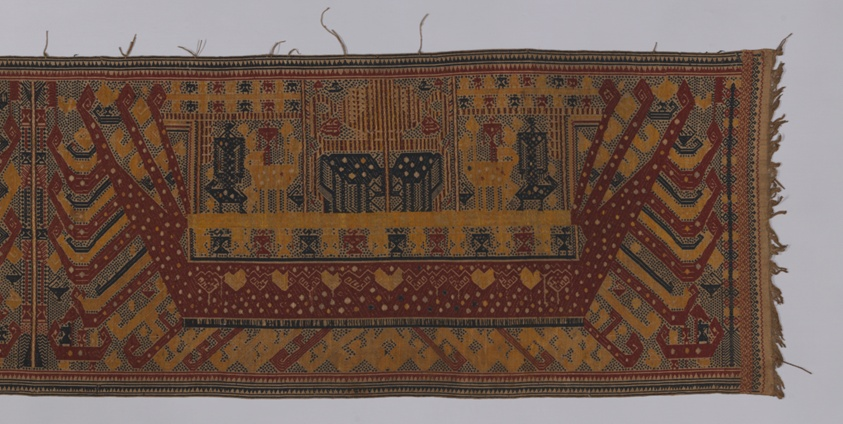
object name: Religious/Ritual Object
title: Ceremonial Hanging (palepai)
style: indonesian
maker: Paminggir people; Indonesia, South Sumatra, Lampung area, Kalianda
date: 19th century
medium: Cotton, silk, and silver-leaf-over-lacquered-paper-strip-wrapped bast fiber (probably ramie), plain weave with supplementary patterning and brocading wefts, main warp fringe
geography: Indonesia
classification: textile; weaving; ritual objects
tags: boats, figures (representations), seas, waves